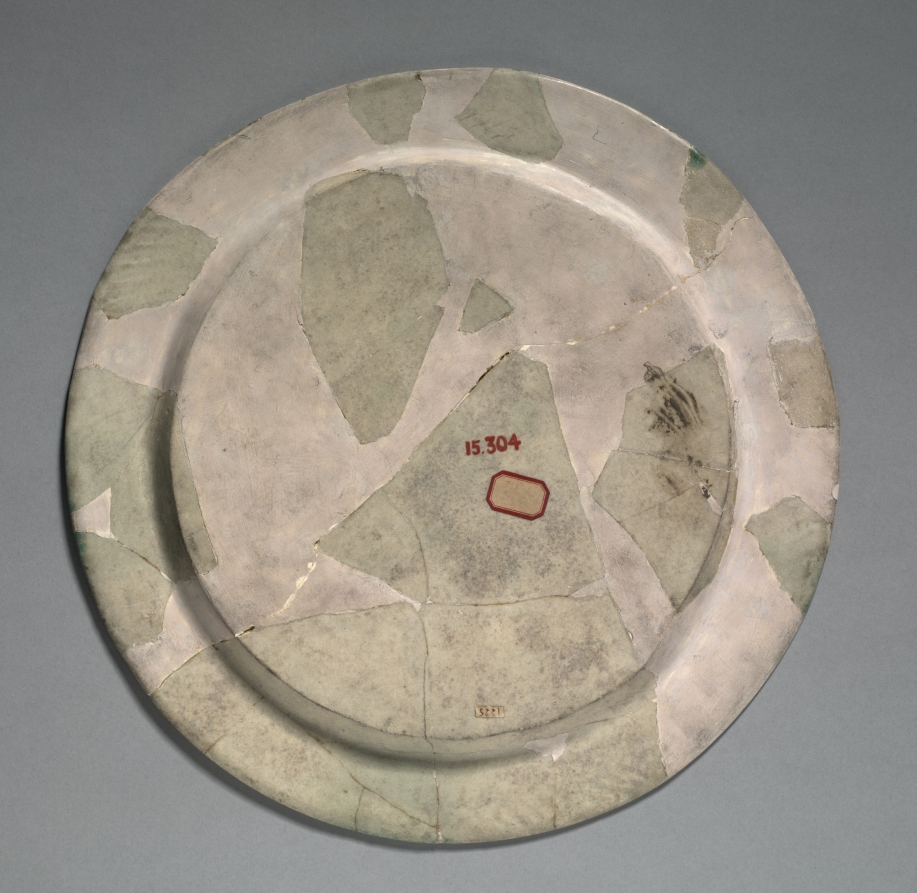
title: Dish with Splashes of Green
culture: Iraq, Basra, Abbasid period (750–1258)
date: 830–900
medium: Earthenware with overglaze design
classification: Ceramic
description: This dish displays two great technological advances of the 800s: the invention of opaque white glaze made with tin (imitating Chinese porcelain) and painting in cobalt blue. The blue paint was sometimes used to decorate the center of the bowl with floral and geometric designs, as seen here, or to write Arabic inscriptions offering blessings and well wishes. The green splashes around the rim reflect a popular color choice at the time. The splash effect was made by placing green glaze at the edge of the rim and then allowing it to run toward the center of the dish.